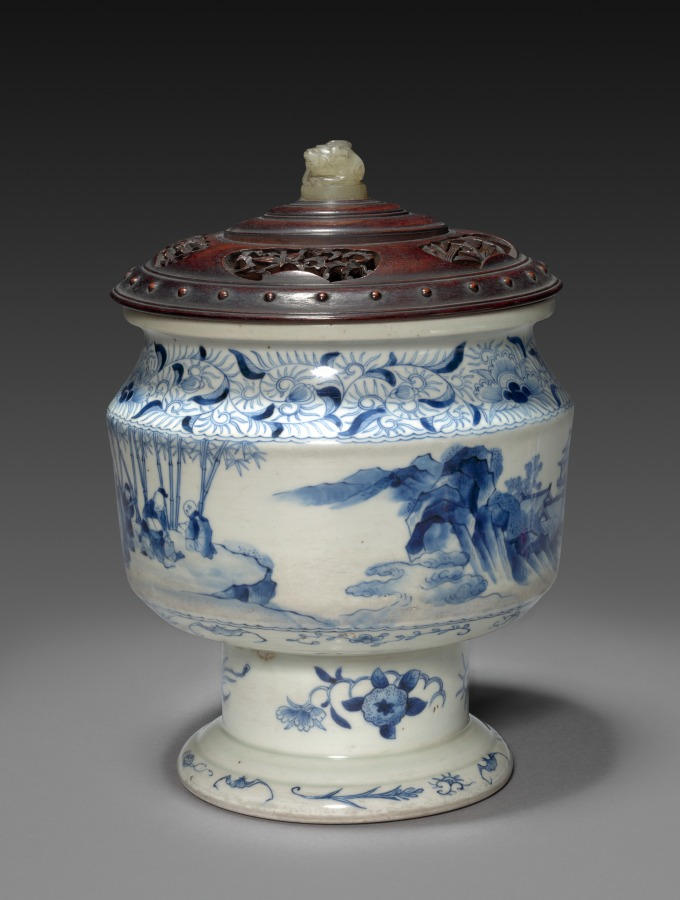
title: Jar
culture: Japan, Edo period (1615–1868)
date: early to mid-1800s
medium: porcelain with underglaze blue; teak and carved stone (lid)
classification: Ceramic